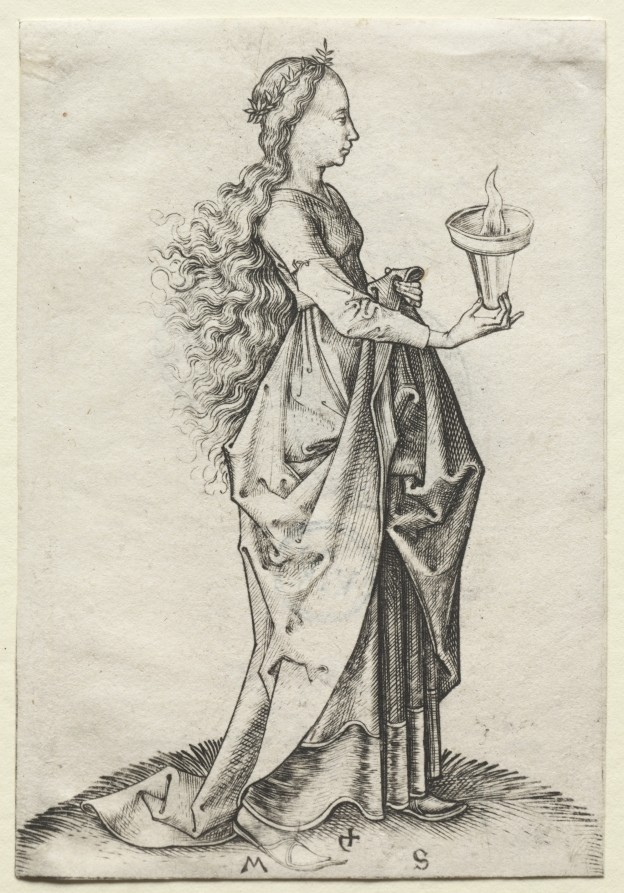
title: The Fifth Wise Virgin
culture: Germany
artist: Martin Schongauer (German, c. 1450–1491)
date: 1469–79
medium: engraving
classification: Print